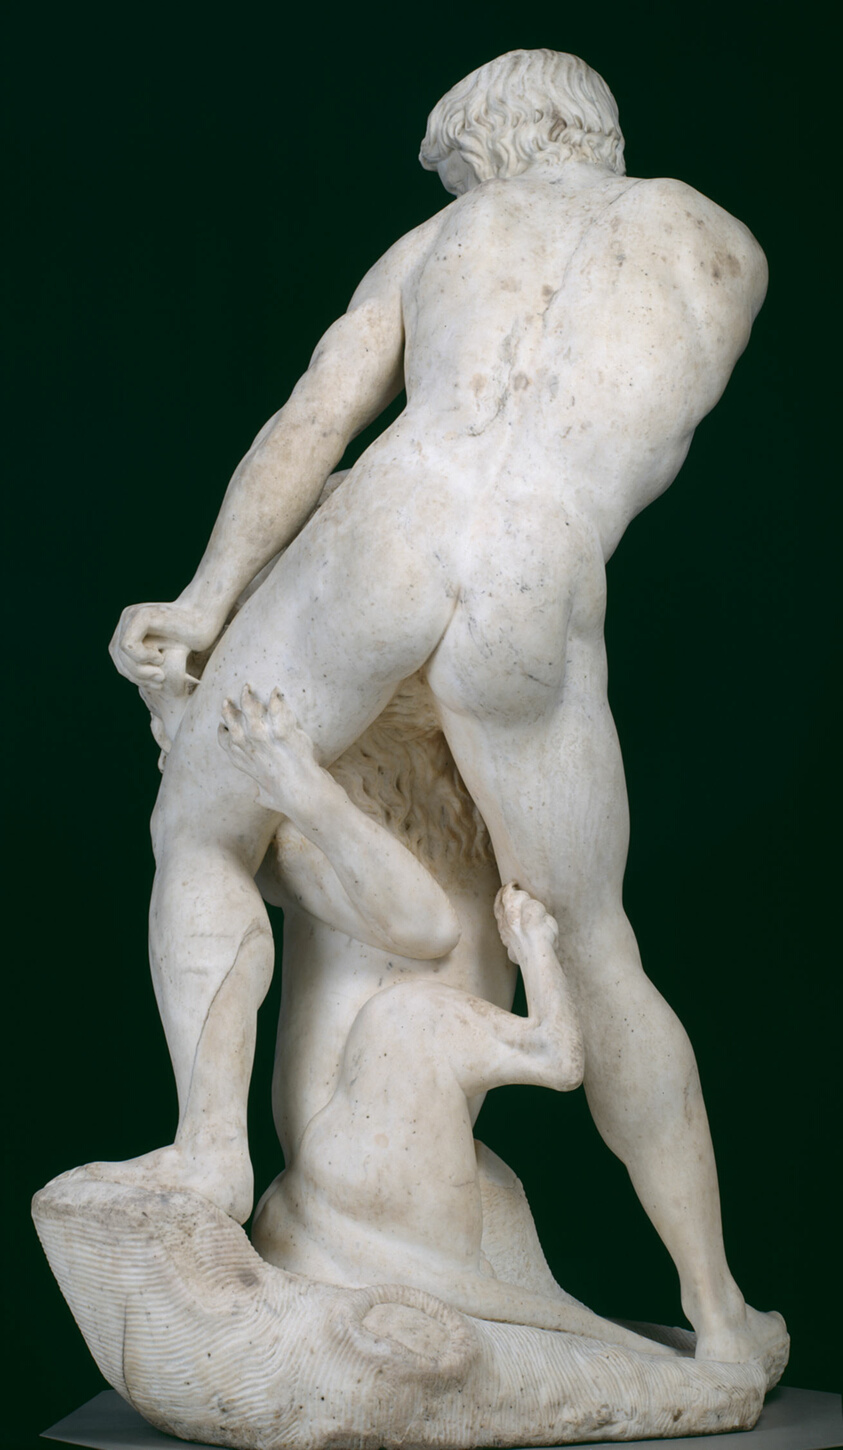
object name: Sculpture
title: Samson and the Lion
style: 17th Century, Baroque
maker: Cristoforo Stati (Italian, 1556–1619)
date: 1604–7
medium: Marble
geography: Italy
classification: large scale; sculpture; Italian; marble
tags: religious, Old Testament, religious scenes, nudes, man, figure, biblical, animals, lions, religious figures